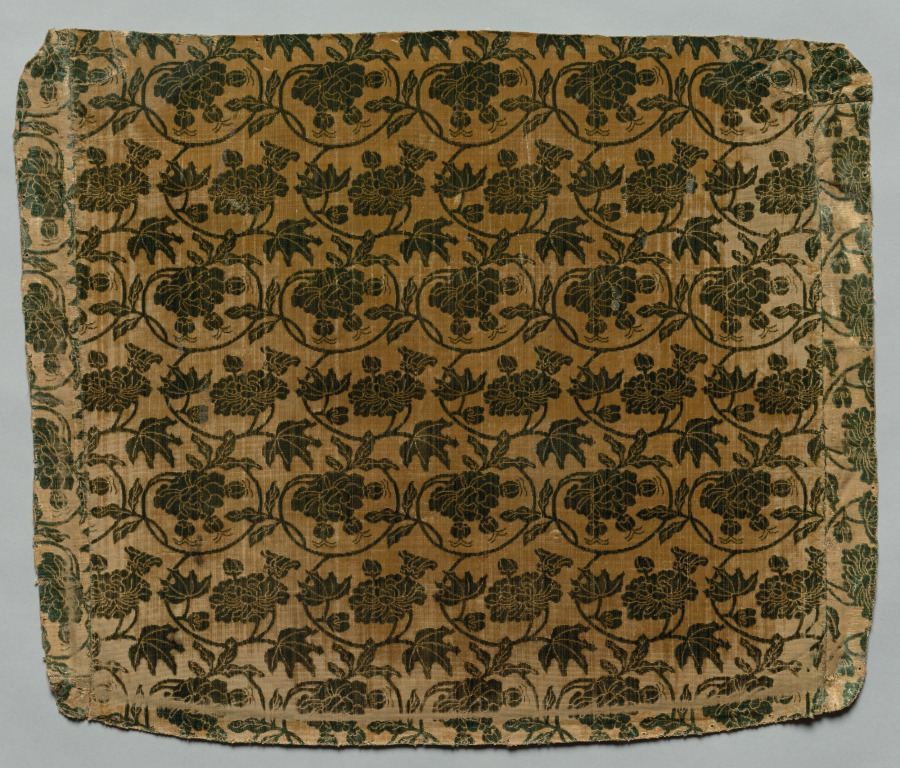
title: fragment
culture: China, 18th century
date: 1700s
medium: velvet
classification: Velvet